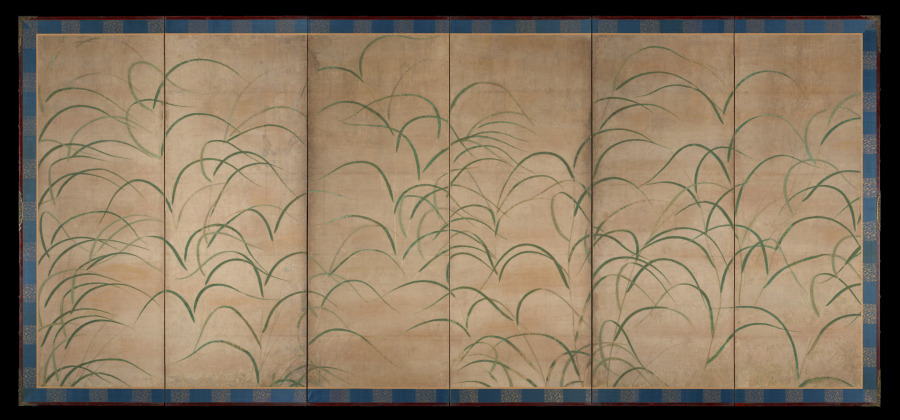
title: Susuki Grass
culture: Japan, Muromachi period (1392–1573)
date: c. 1525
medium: One of a pair of six-panel folding screens; ink, color, and gold on paper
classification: Painting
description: Susuki grass has a seasonal association with autumn in the Japanese visual and literary tradition. It is one of the “Seven Flowers of Autumn,” along with bush clover, arrowroot, pink, patrinia, mistflower, and bellflower. This composition immerses the beholder in a field of grasses and golden bands of mist. The design may have served as a backdrop for poems brushed in ink on decorated papers and attached to the surface of the screens, a practice with a long tradition in Japan.